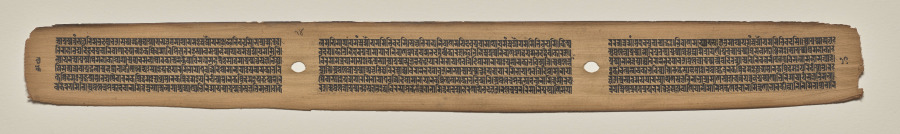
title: Text, Folio 14 (verso), from a Manuscript of the Perfection of Wisdom in Eight Thousand Lines (Ashtasahasrika Prajnaparamita-sutra)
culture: Eastern India, Bihar, Vikramashila Monastery. Painting: Nepal, Kathmandu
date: Sunday, September 14, 1119 (year 239 of the Newar Samvat in the month of Ashvina)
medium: gum tempera and ink on palm leaves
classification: Painting